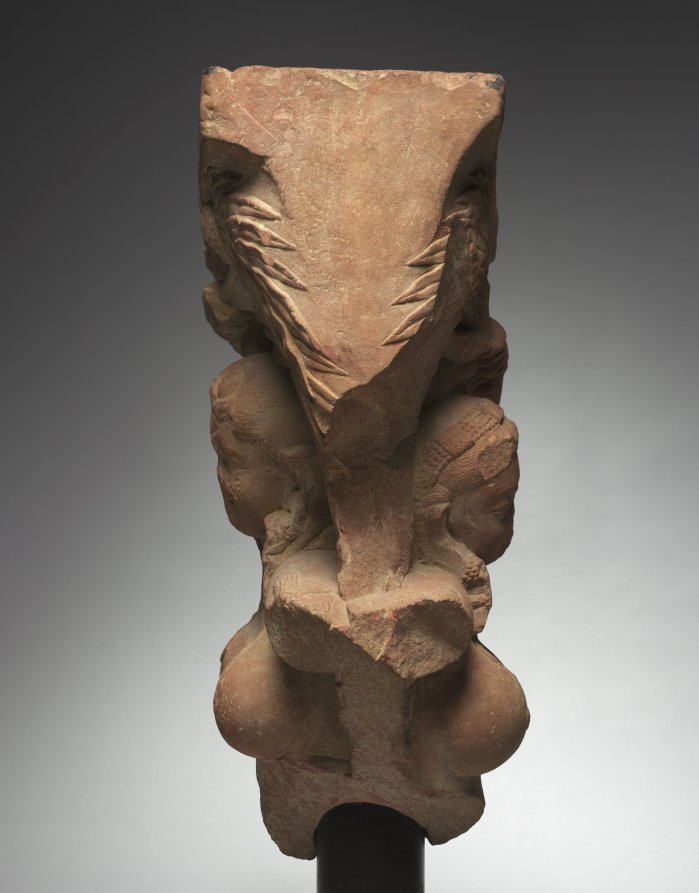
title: Gateway Bracket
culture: India, Mathura, Kushan period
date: 150–200 CE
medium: sandstone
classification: Sculpture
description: Gateways leading into a sacred area often had large horizontal architraves, the weight of which was supported by brackets carved with figures of voluptuous women grasping the branch of a tree. They embody the ideal form of the young mother, with breasts full of nourishing milk. As personifications of the sap that pervades living plants, they are auspicious markers of life and abundance. These attractive figures, who embody the purifying water essential for life, symbolically cleanse visitors as they enter the sacred space. On both sides of this large bracket they grasp the branch of an ashoka tree, which has clusters of flowers that are bright red in nature.